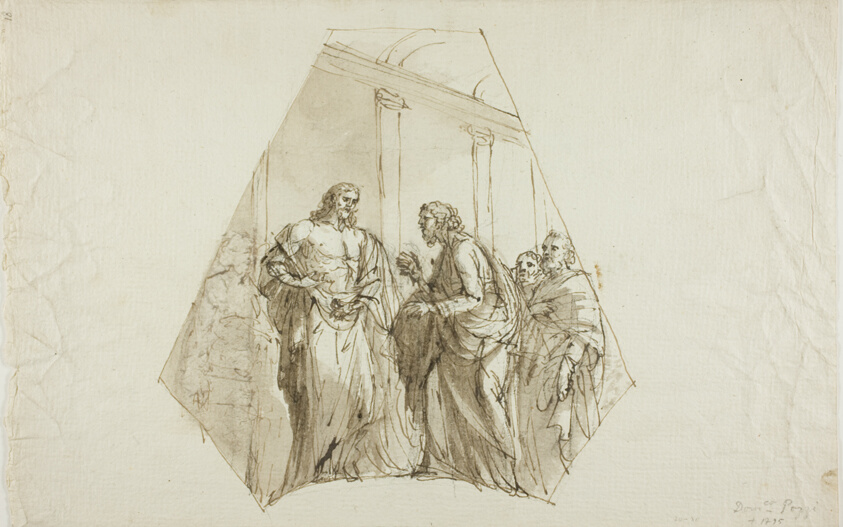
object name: Drawing and Watercolor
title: Doubting Thomas (Spandrel Design)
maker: Attributed to Domenico Pozzi; Italian, 1744-1796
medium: Pen and brown ink, with brush and brown and gray wash, over black chalk on ivory laid paper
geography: Italy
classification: pen and ink drawings; drawings (visual works); prints and drawing